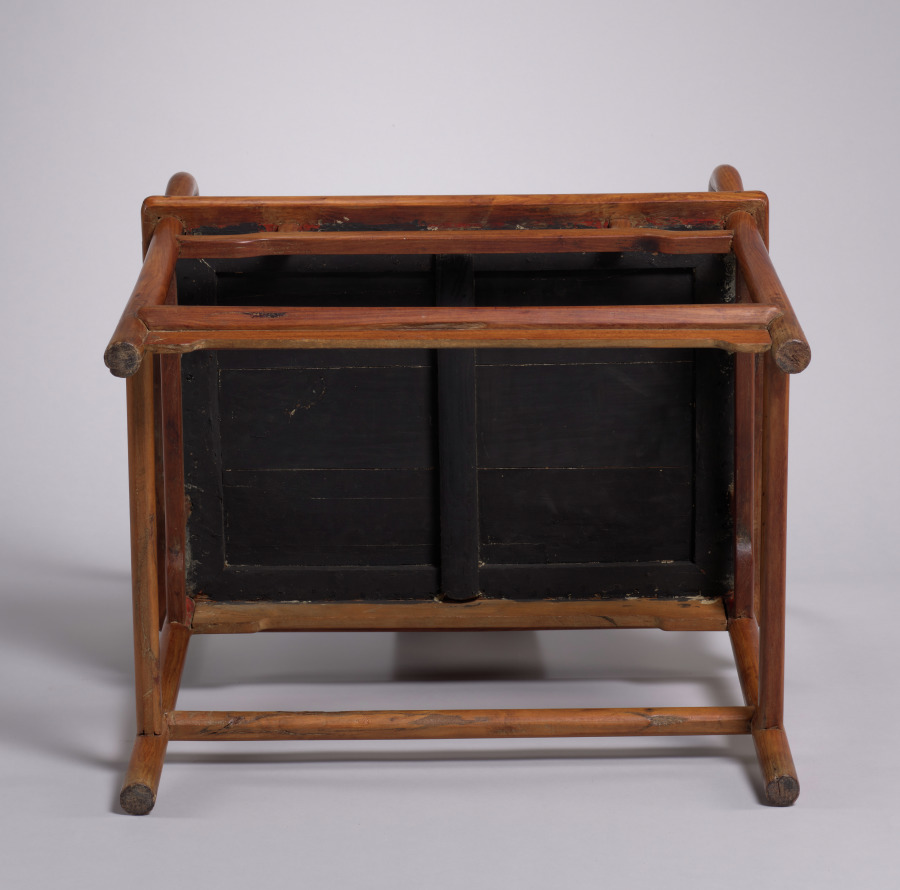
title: Roundback Armchair: Lohan Type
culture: China, Jiangsu province, Ming dynasty (1368–1644) or Qing dynasty (1644–1911)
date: 1600s–1700s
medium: Rosewood (huanghuali)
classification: Furniture and woodwork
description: In history, China moved from an original floor culture to high chairs and tables, developing a unique tradition of craftsmanship. Although still relatively unexplored, the manufacturing and styles of furniture differ by region. This horseshoe-back armchair was made in Jiangsu province. Its simplicity and minimalist elegance is characteristic of Suzhou-style furniture and aesthetics. The back of the chair is made of seven pieces of wood, joined and secured with an inserted wooden pin, a mortise-tenon technique that appeared in its earliest form in Neolithic fragments of the Hemudu culture.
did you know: Similar chairs with low, straight backs were presumably used by women or in a less formal context.